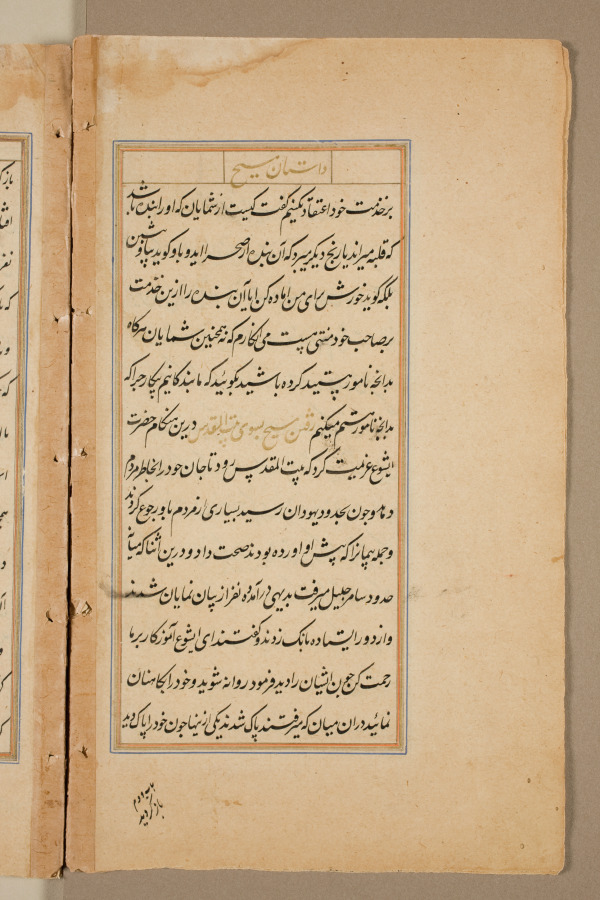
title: Text page from a Mirror of Holiness (Mir’at al-quds) of Father Jerome Xavier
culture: Mughal India, Allahabad, made for Prince Salim (1569–1627)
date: 1602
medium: Ink and gold on paper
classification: Manuscript